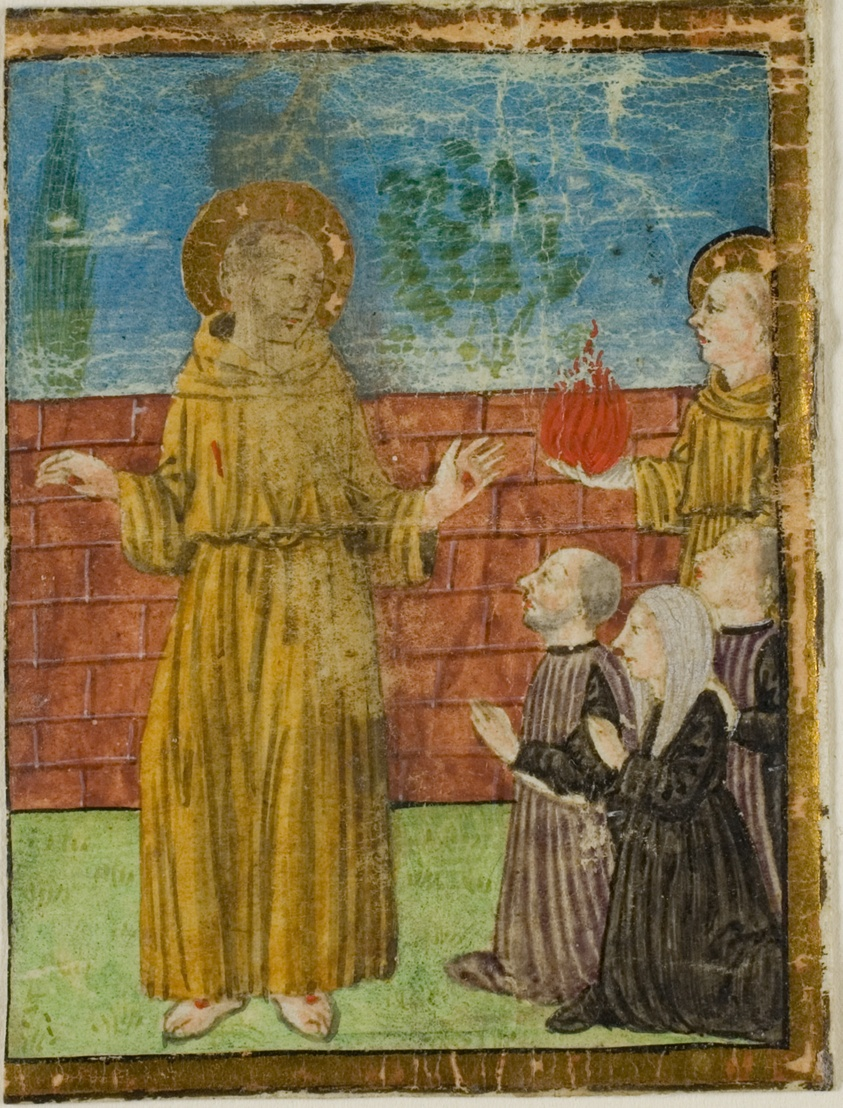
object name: Drawing and Watercolor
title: St. Francis of Assisi with Donors in a Historiated Initial from an Unidentified Manuscript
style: medieval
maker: Italian (Florence)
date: c. 1400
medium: Manuscript cutting in tempera and gold leaf on parchment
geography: Italy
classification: tempera; manuscript; drawings (visual works); prints and drawing